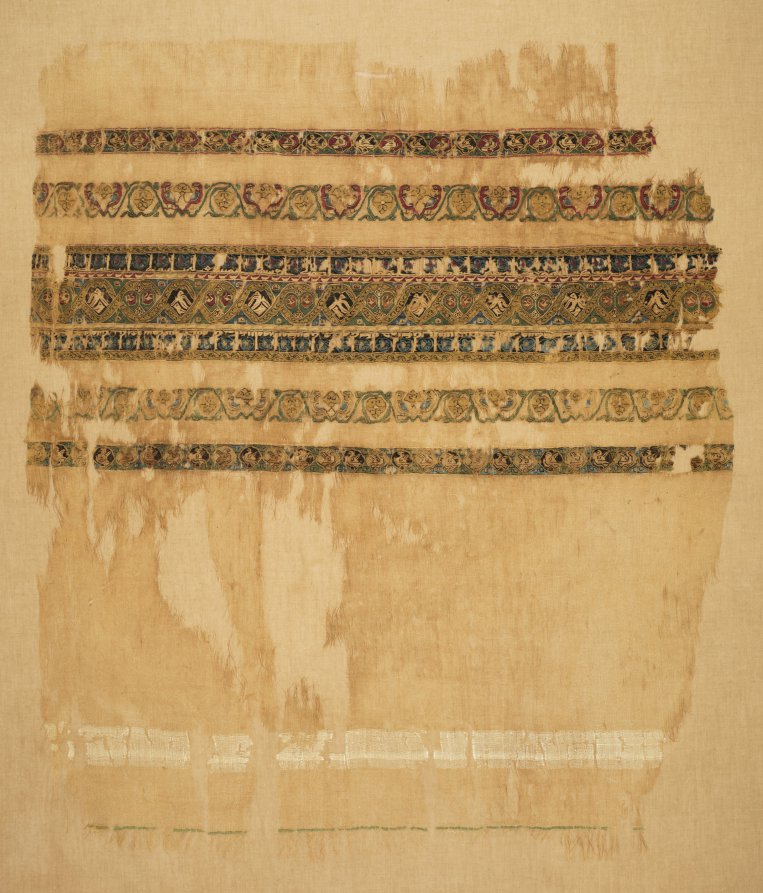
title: Turban or shawl end with tiraz and gold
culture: Egypt, Fatimid period, reign of al-Musta‘lī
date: 1094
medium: plain weave with inwoven tapestry weave: linen, silk, and gold filé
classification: Textile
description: Woven with consummate skill, this very fine linen fabric enriched with silk and gold thread displays small birds amid interlacing bands flanked by Arabic inscriptions. It represents the final artistic and technical height of imperial textiles called tiraz, a Persian word meaning embroidery or decorative work. Here, tiraz refers to textiles with Arabic inscriptions; it can also identify court workshops and their production. The historical Arabic inscription, written in angular Kufic script with decorative letter bowls and palmette scrolls between shafts, reads: “proximate victory to the servant of God and his close friend Ma‘add Abū Tamīm, the imam Ahmad [Abū] al-Qāsim al-Musta‘lī bi-Allāh and his so[ns]” (upper line), and “Commander of the believers bin [a] l-Qāsim Shā[han] shah . . . the believers . . . the Muslims[?] and the believers[?]” (lower line).